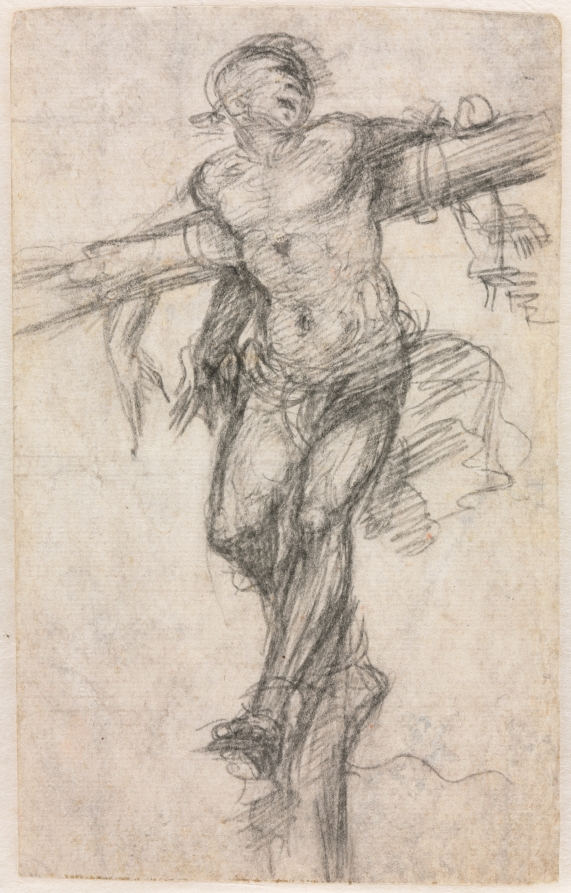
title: The Unrepentant Thief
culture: Italy, 16th century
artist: Sodoma (Italian, 1477–1549)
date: c. 1530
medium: black chalk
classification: Drawing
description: Two thieves were crucified with Christ on Mount Golgotha. One, recognizing Christ's innocence, re-pented his sins, while the other reviled him. In paintings of the crucifixion, this unrepentant thief is depicted at Christ's left. The angle of the cross in this drawing indicates that it is the unrepentant thief who here struggles against the binding ropes. Sodoma was born and trained in Lombardy, but spent most of his life in Siena, where he dominated Sienese painting during the first half of the 16th century. Known for his emotionally charged paintings as well as for his eccentric lifestyle, Sodoma's individuality is evident in his drawings. Here, in the first drawing by this important Renaissance artist to enter the museum's collection, the scratchy and trailing lines of the figure, with its various pentimenti (changes) create the active tension and nervous movement that both enliven the form and suggest the pain of the suffering thief.